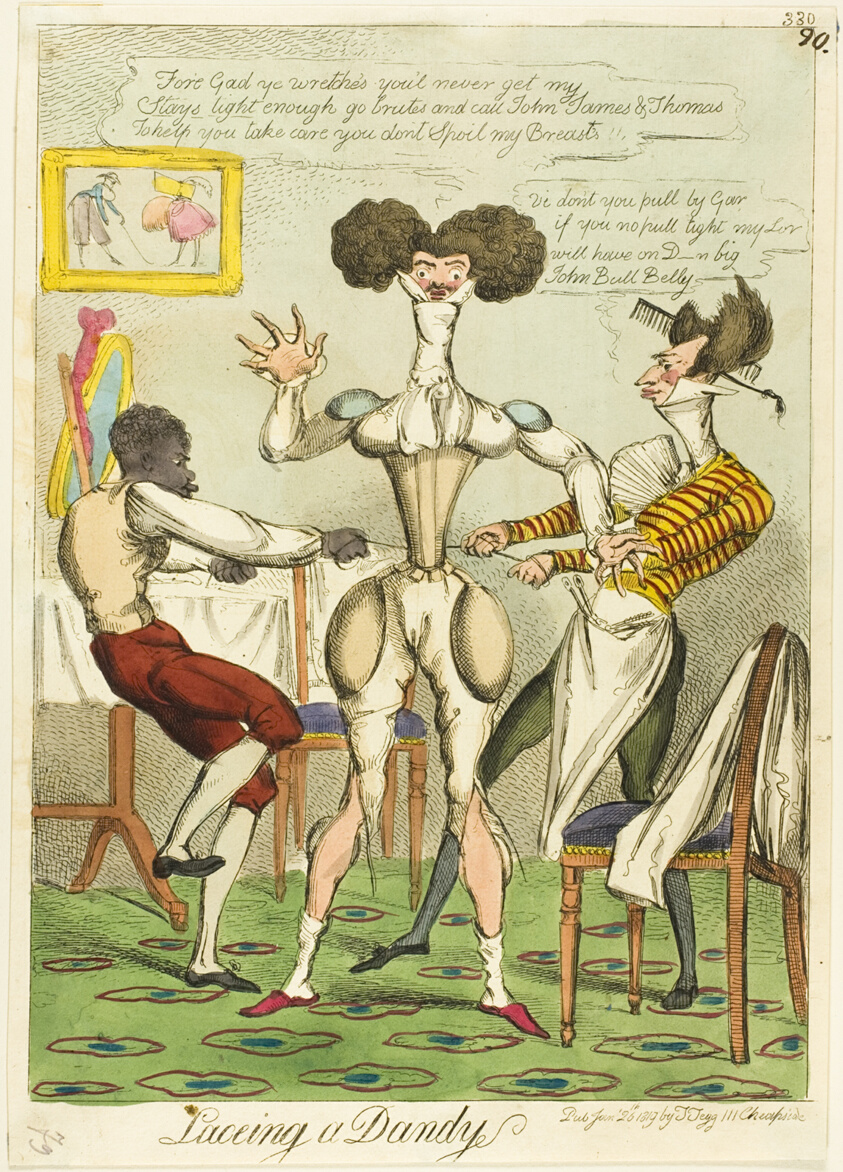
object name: Print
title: Lacing a Dandy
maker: Unknown Artist (English); published by Thomas Tegg (English, 1776-1845)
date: published January 26, 1819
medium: Handcolored etching on cream wove paper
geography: England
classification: etching; print; prints and drawing